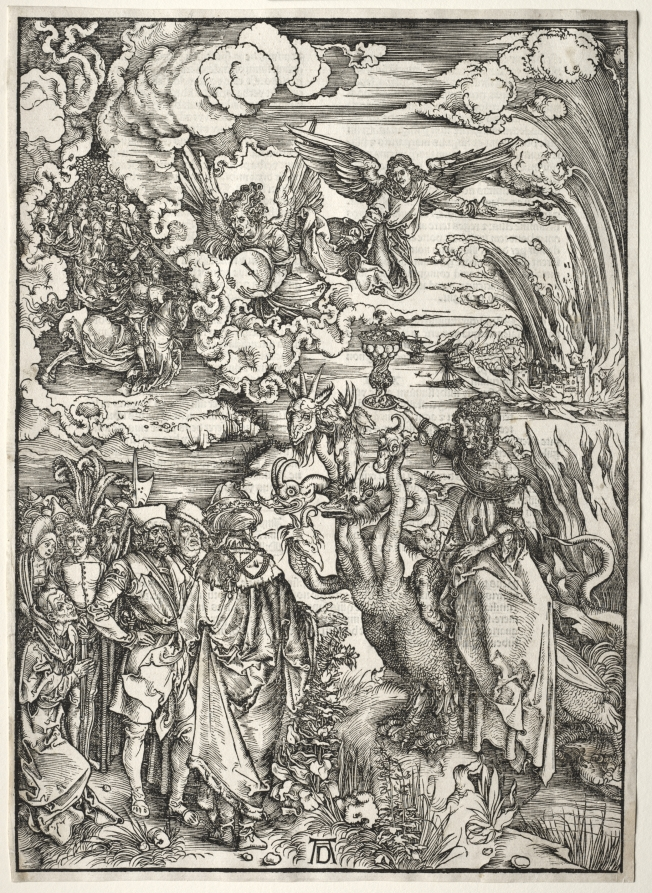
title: Revelation of St. John: The Woman of Babylon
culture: Germany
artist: Albrecht Dürer (German, 1471–1528)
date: 1511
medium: woodcut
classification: Print